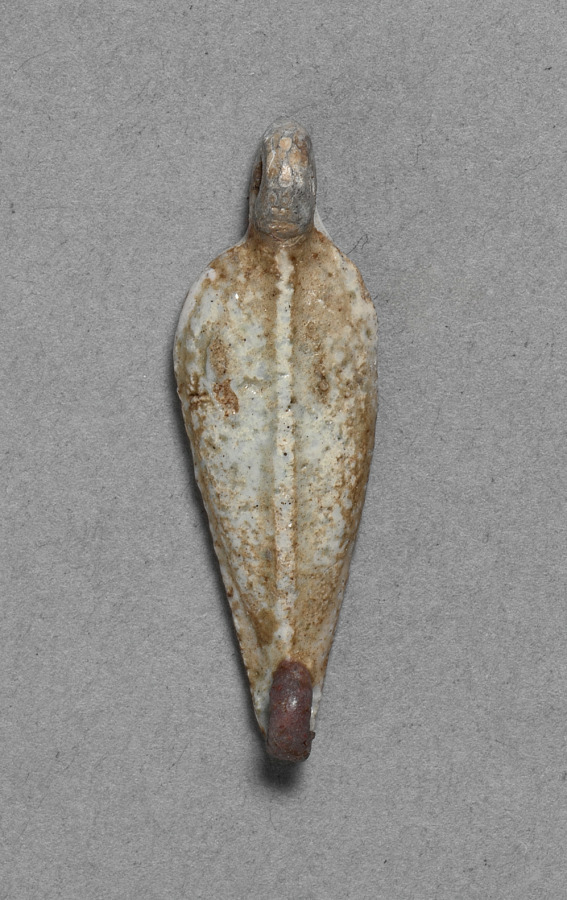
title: Petal-Shaped Bead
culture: Egypt, New Kingdom (1540–1069 BCE), Dynasty 18, reign of Amenhotep III (1390–1352 BCE)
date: c. 1391–1353 BCE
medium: faience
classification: Jewelry